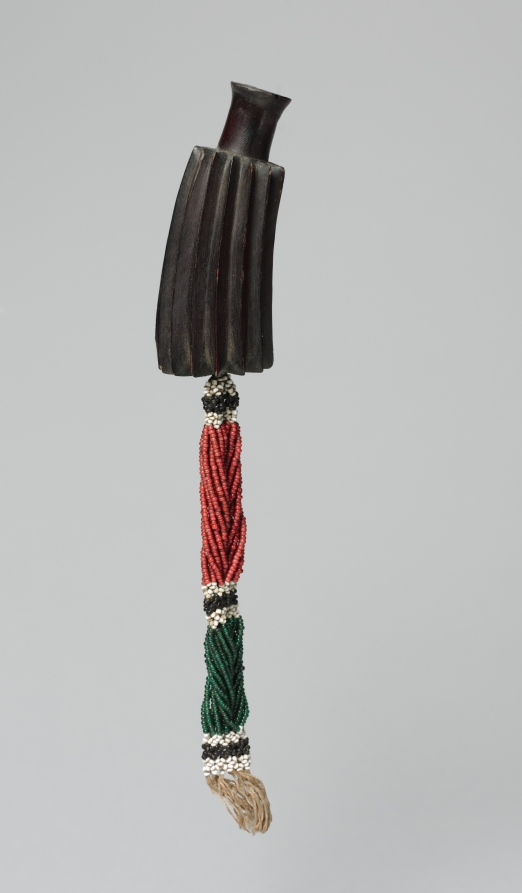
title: Snuff Container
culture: Africa, Southern Africa, South Africa, Northern Nguni-style maker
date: 1800s–1900s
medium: Wood, glass beads, shell, and cotton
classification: Vessels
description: Combining beauty and functionality, this finely carved wooden snuff container is adorned with twisted strands of colorful glass beads. Once an object of status, it signaled the wealth and taste of its owner. Its general shape and the parallel ridges appear to be the skillful imitation of a fruit. Throughout southern Africa and elsewhere on the continent, smoking tobacco and taking snuff are enjoyed as activities that enhance positive social relationships. Both men and women wore these personal and portable objects attached to cloaks, carried in bags, or adorning the neck, arm, or waist.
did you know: A man likely made the wooden container while a woman likely made the beaded attachment.